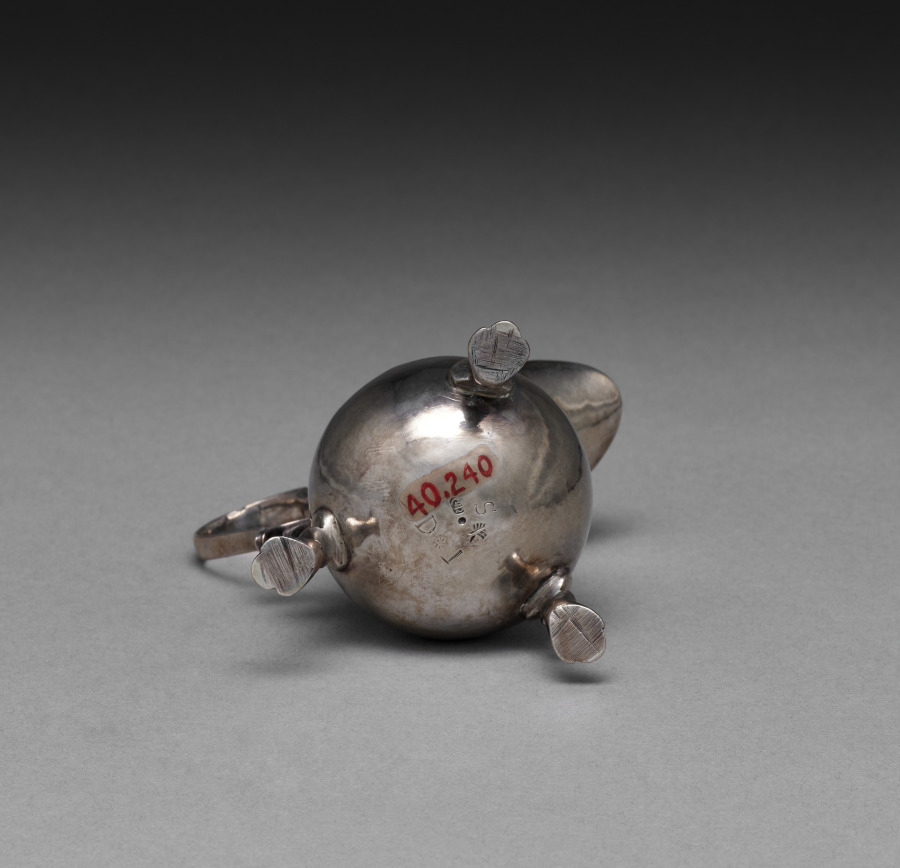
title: Cream Jug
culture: America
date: c. 1760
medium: silver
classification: Silver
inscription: engraved "S" and "D*I" in block letters on bottom along with a treelike device.